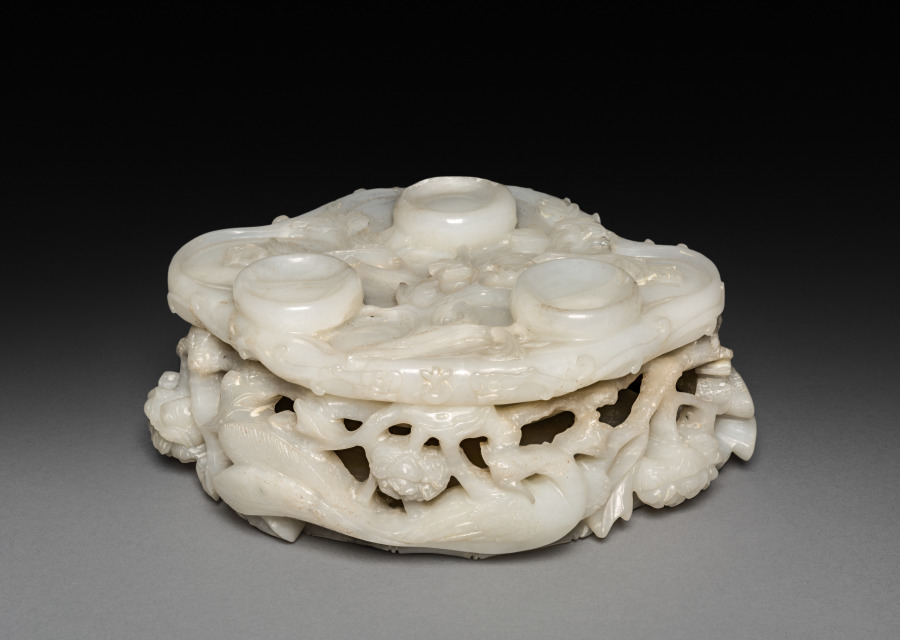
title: Three-Sectional Altar Group: Koro (bottom section of base)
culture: China, Qing dynasty (1644-1911)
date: 1644–1911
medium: jade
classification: Jade